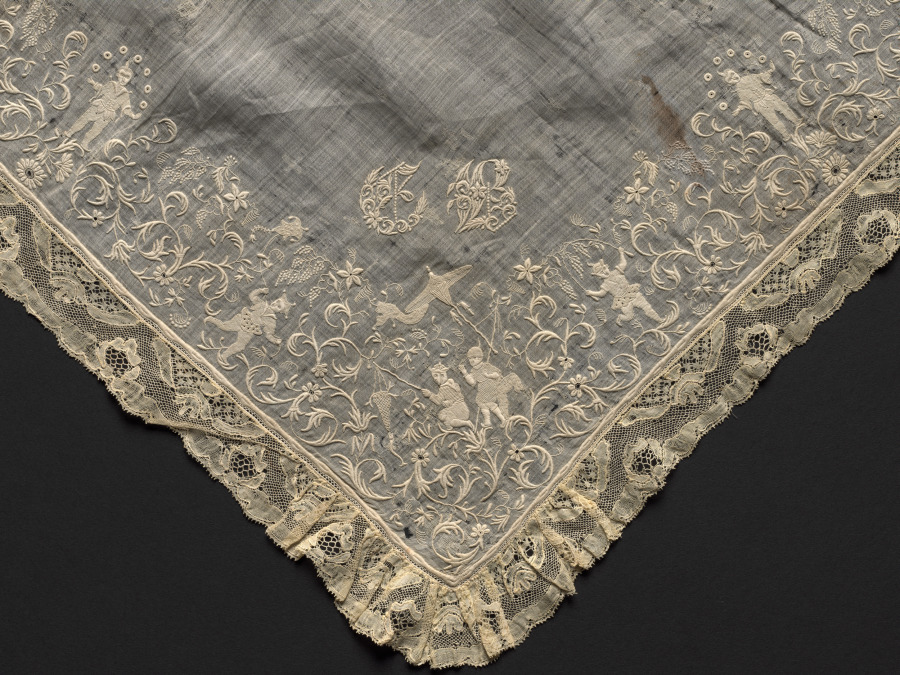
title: Lace Handkerchief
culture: France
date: 1700s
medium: Plain weave linen ground: bobbin lace (Mechelen lace) edging and embroidery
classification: Embroidery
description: The initials E. B. are embroidered in one corner of this handkerchief.